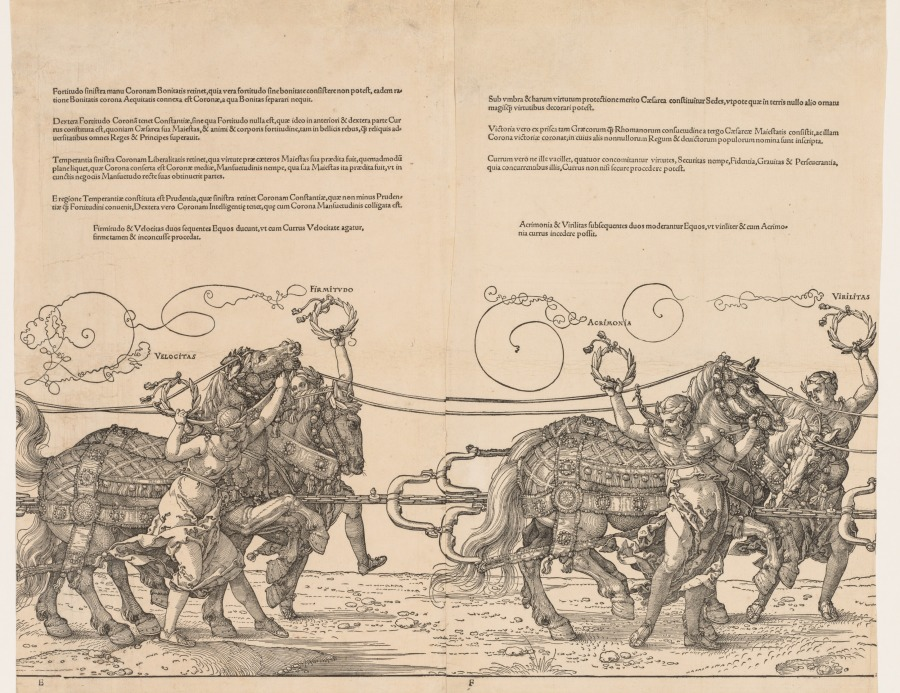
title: The Great Triumphal Car of Emperor Maximilian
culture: Germany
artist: Albrecht Dürer (German, 1471–1528)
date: 1523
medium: woodcut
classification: Print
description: Dürer conceived this fantastical chariot as part of a larger commission to depict Holy Roman Emperor Maximilian I (reigned 1486–1519) in a triumphal procession. The ruler sits enthroned in the lavish car, as Victory holds a laurel wreath above his imperial crown. Her feathered wings list Maximilian’s military campaigns. Nearly every component of the allegorical pageant—from the entourage of female attendants to the laurel garlands—has a Latin label describing honorable qualities of an ideal prince. The car rolls on wheels of Magnificence, Honor, Dignity, and Glory. Its driver is Reason, who guides a team of 12 horses with reins of Nobility and Power. Virtues of Justice, Strength, Wisdom, and Temperance, stand on pedestals arranged around the emperor. Maximilian died in 1519, before the ambitious commission could be completed. Dürer published The Great Triumphal Car at his own expense with text composed by his friend Willibald Pirckheimer (1470–1530).